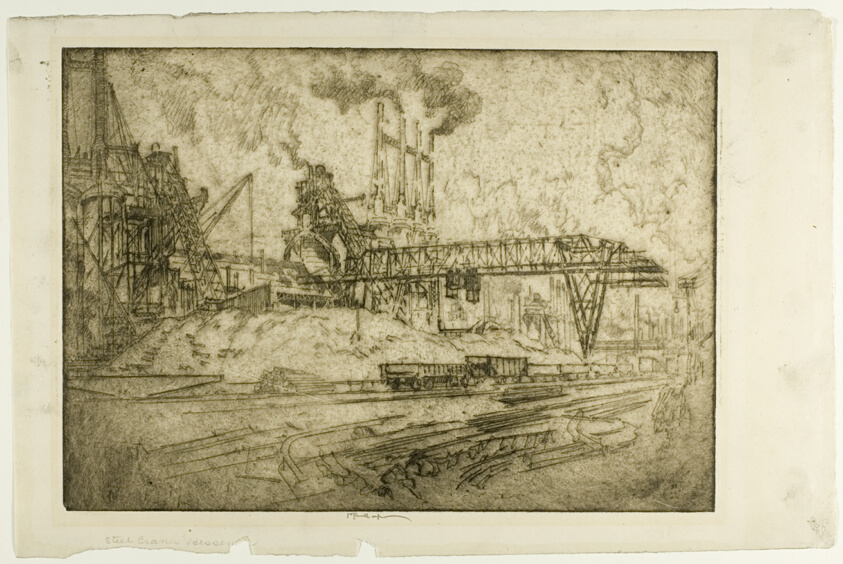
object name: Print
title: Cranes, Bessemer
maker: Joseph Pennell (American, 1857-1926)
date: 1909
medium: Etching on ivory laid paper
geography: United States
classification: etching; print; prints and drawing